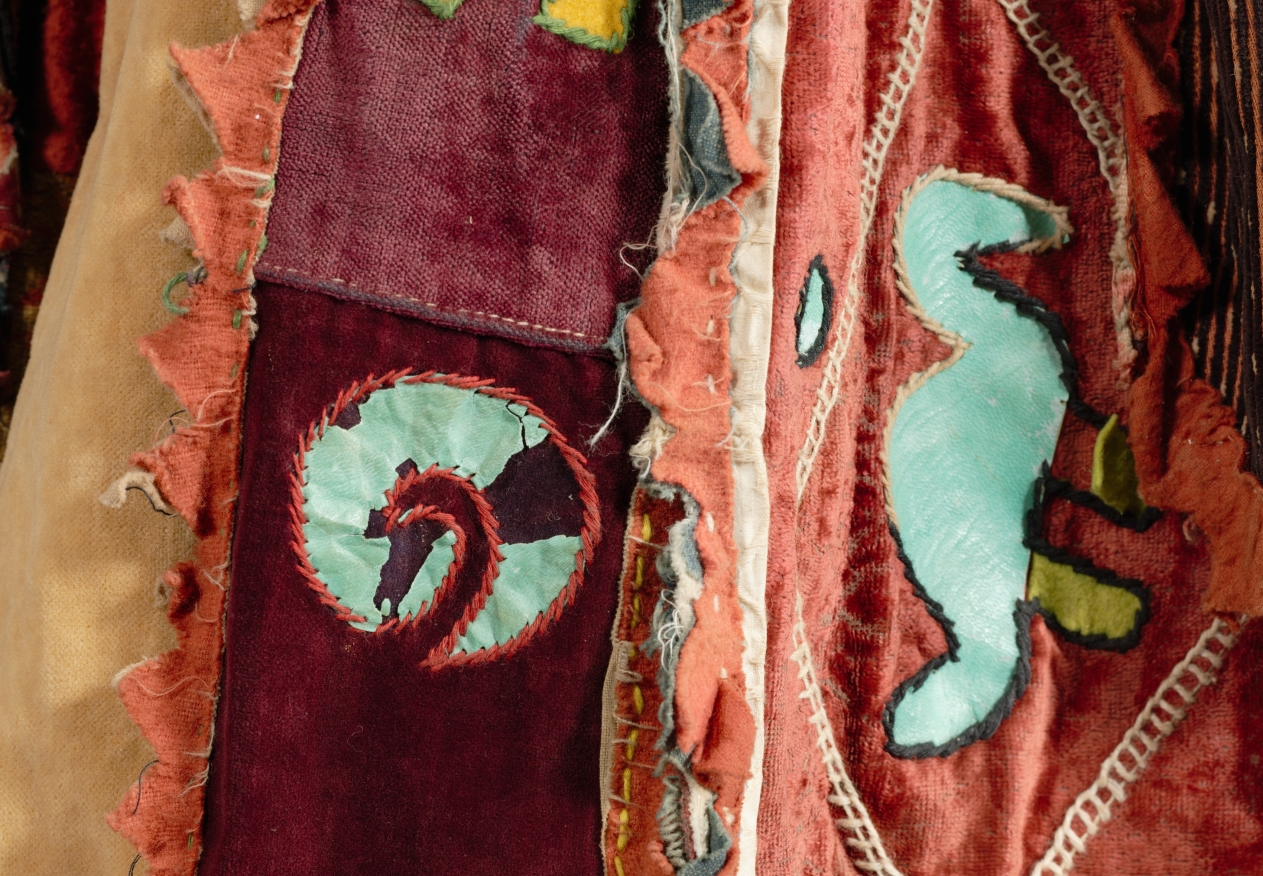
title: Egúngún Masquerade Dance Costume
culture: Africa, West Africa, Nigeria, Yorùbá-style maker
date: 1900s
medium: cotton, velvet, flannel, leather, dye, probably wood, cowrie shells, metal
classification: Mask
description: Swirling into motion, egúngún masquerade costumes appear during annual festivities to bless the community. Manifesting ancestral spirits, they serve as a bridge between the living and the otherworld. The fabric panels create a dwelling place for ancestral spirits. Arranged and selected according to Yorùbá design sense (ojú-ọnà), this mask incorporates hundreds of African, Asian, and European fabrics. These include imported damasks, velvets, faux furs, and embroideries, as well as local indigo-dyed cottons.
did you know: This masquerade costume is made from both imported and locally made fabrics.